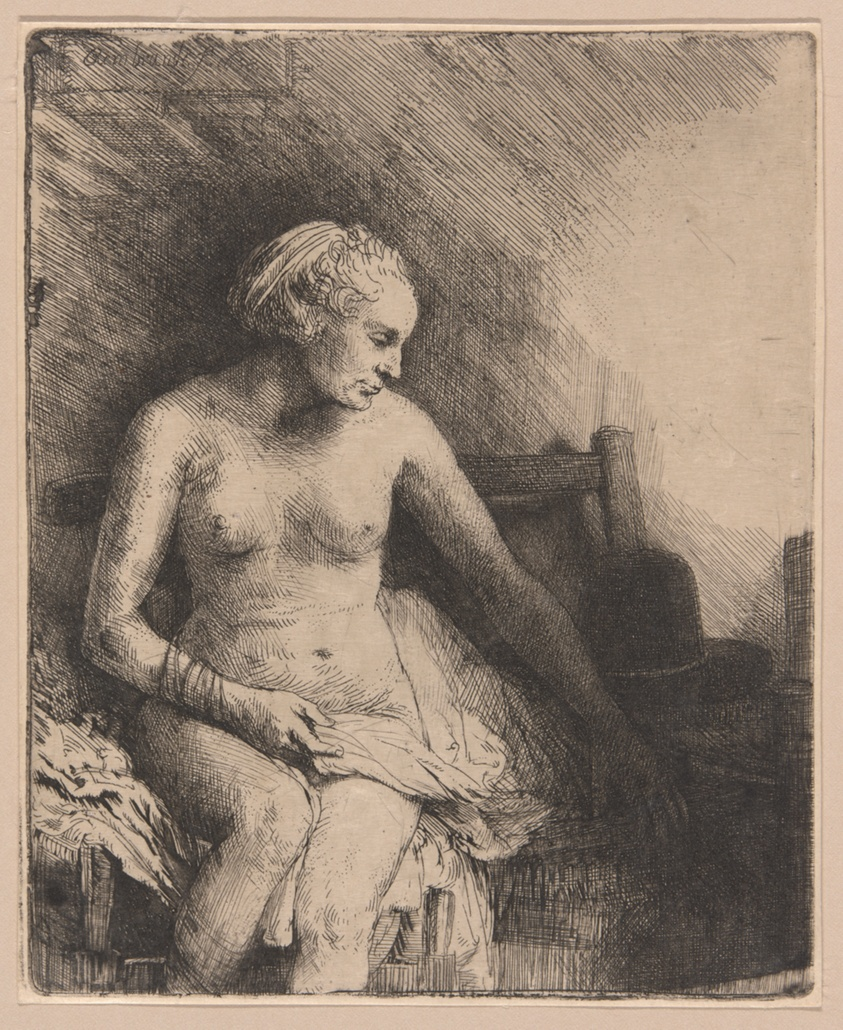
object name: Print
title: Woman at the Bath with a Hat Beside Her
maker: Rembrandt van Rijn (Dutch, 1606-1669)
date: 1658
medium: Etching and drypoint in black on ivory Japanese paper, laid down on ivory Japanese paper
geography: Netherlands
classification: etching; paper; print; prints and drawing; drypoint